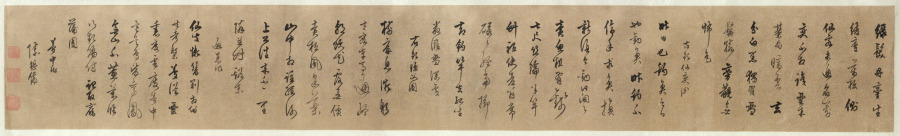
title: Four Poems: Calligraphy in Cursive Script (xingshu)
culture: China, Ming dynasty (1368–1644)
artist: Chen Jiru (Chinese, 1558–1639)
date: 1500s-1600s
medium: handscroll; ink on gold speckled paper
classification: Calligraphy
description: Written in graceful calligraphy with well-composed characters, the artist communicates his thoughts and state of mind in four poems. Characters written in dark, thick strokes convey rhythm, and indicate the moment after the writer had paused to recharge his brush with ink. Chen Jiru was a native of Huating (modern Shanghai). His calligraphy style resembles that of his friend, influential calligrapher Dong Qichang (1555–1636). Unlike Dong, Chen did not pursue government service: he burned his Confucian robes, declined a summons to serve at court, and immersed himself in literature, calligraphy, and painting.